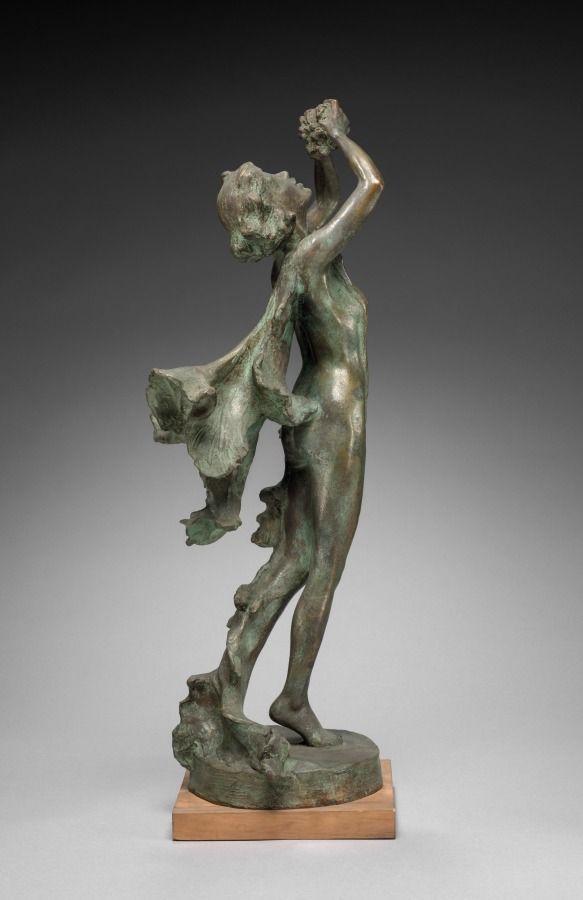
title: Fountain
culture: America, Ohio, Cleveland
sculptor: Jessica Wakem McMurray (American, born England, 1874–1950)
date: 1920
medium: bronze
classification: Sculpture